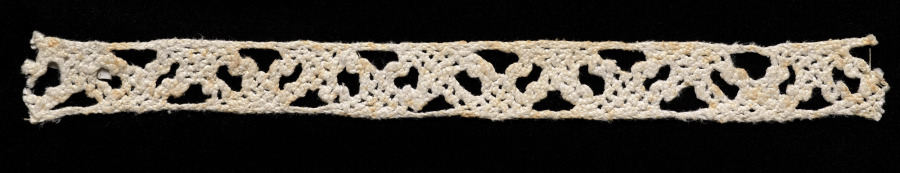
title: Lace Insertion (with selvage)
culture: Italy, Venice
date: 1580–99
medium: Bobbin lace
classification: Lace